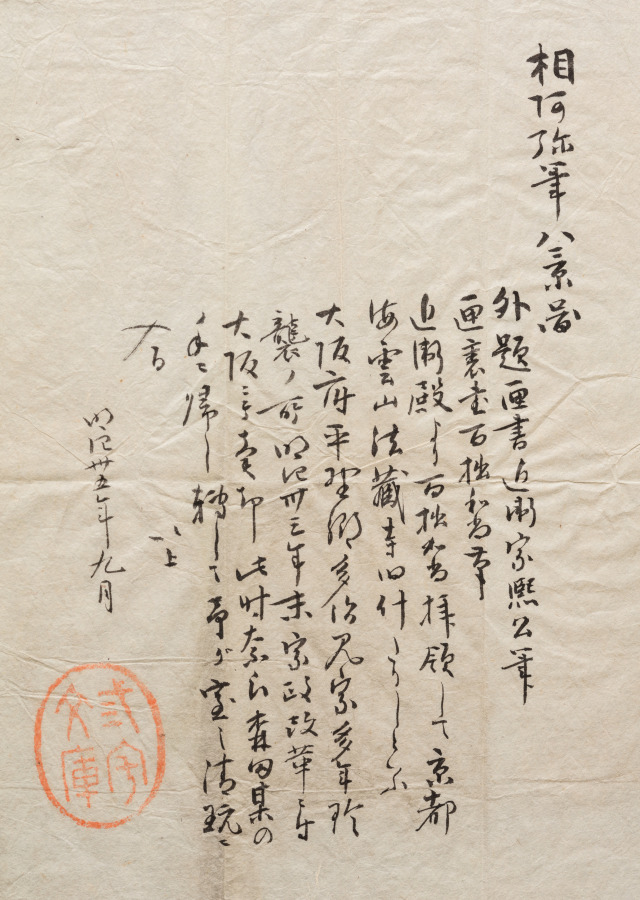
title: Landscape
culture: Japan, Edo period (1615–1868)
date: early 1600s to mid-1800s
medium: hanging scroll; ink on paper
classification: Painting